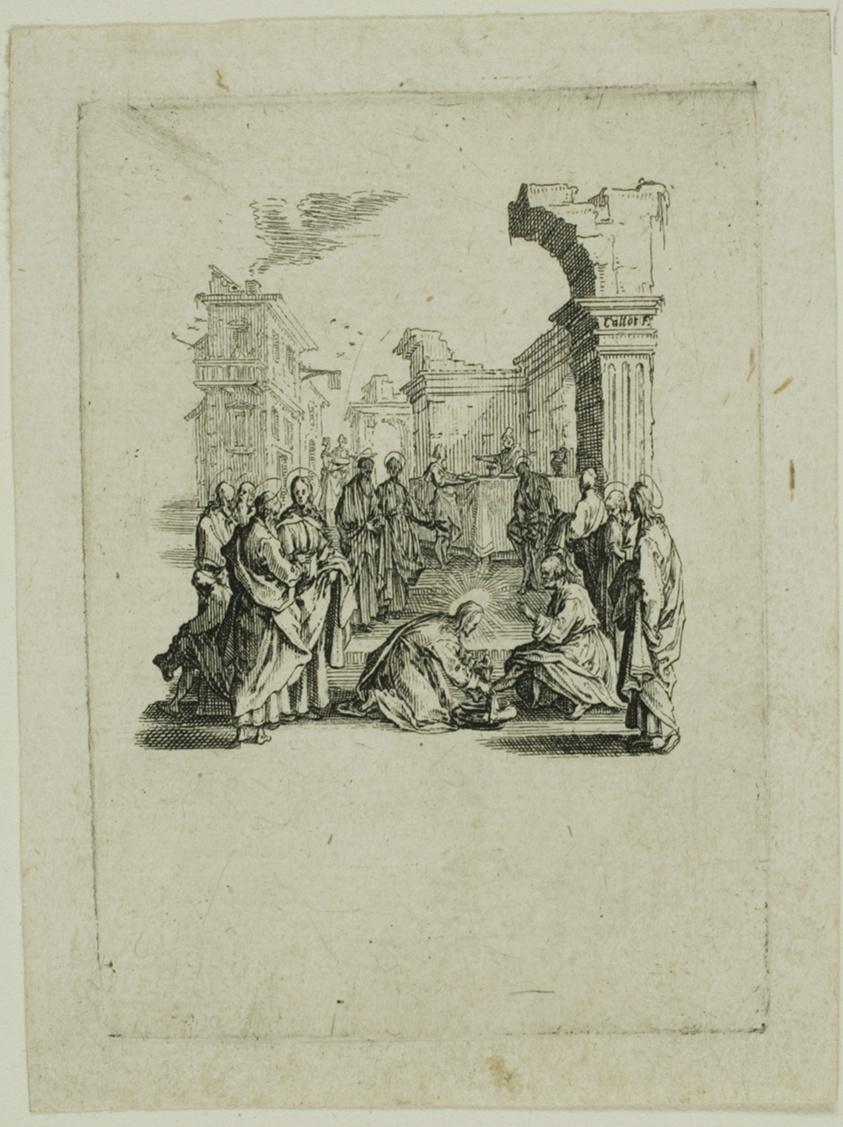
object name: Print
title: Washing the Feet, from The Small Passion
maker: Jacques Callot (French, 1592-1635)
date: 1624/31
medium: Etching on ivory laid paper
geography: France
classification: etching; print; prints and drawing